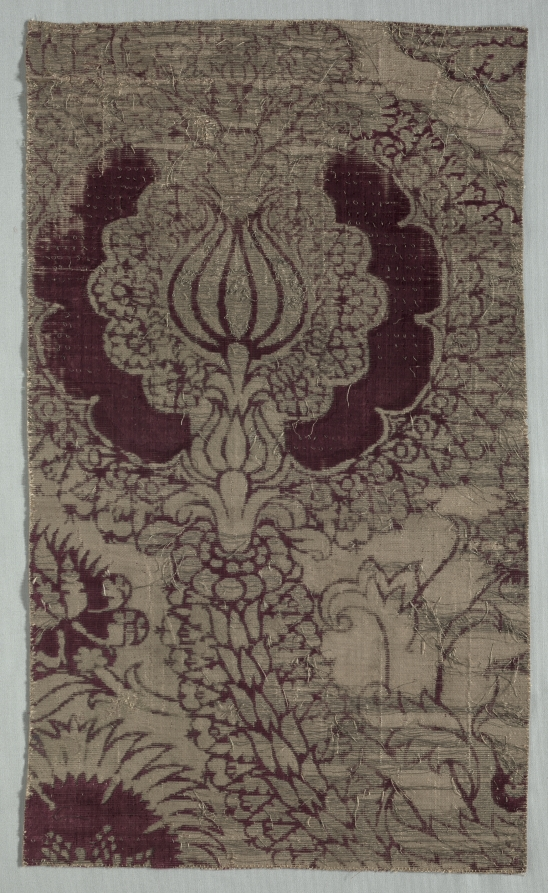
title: Velvet Fragment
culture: Italy, 15th century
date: 1400s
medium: velvet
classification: Velvet